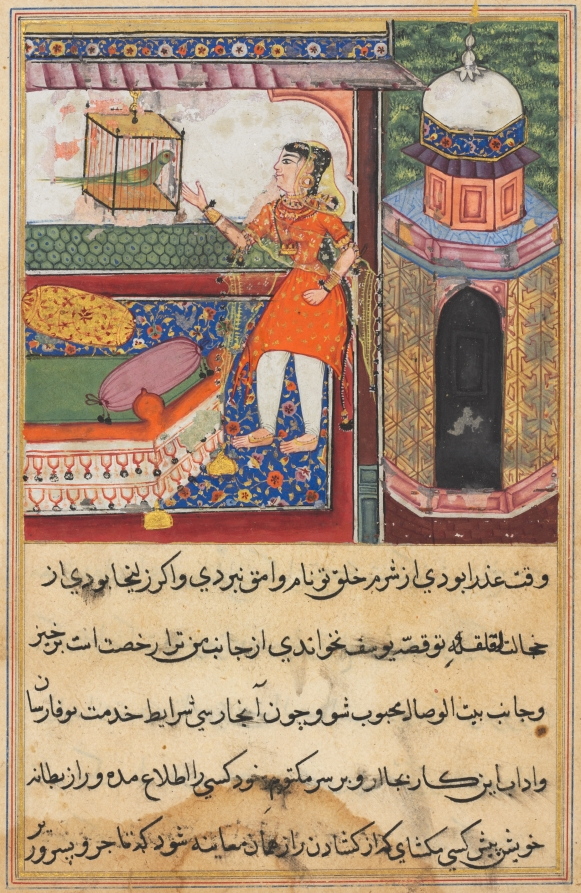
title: The Parrot Addresses Khujasta at the Beginning of the Tenth Night, from a Tuti-nama (Tales of a Parrot)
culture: Mughal India, court of Akbar (reigned 1556–1605)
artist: Iqbal (Indian, active 1550s-1590s)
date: c. 1560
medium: gum tempera, ink, and gold on paper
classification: Painting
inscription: iqbāl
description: Tuti the wise parrot begins to tell Khujasta a moralizing tale of a merchant, the son of a vizier, and a magical, wooden parrot. An inscription in the margin of this page attributes it to the painter Iqbal.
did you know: Khujasta’s large face and the rendering of her scarf are vestiges of an earlier style.